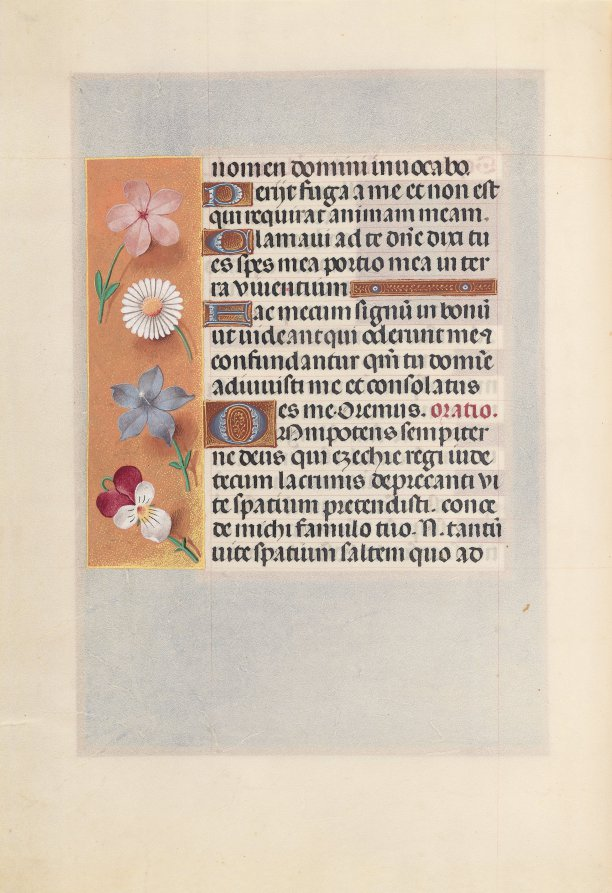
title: Hours of Queen Isabella the Catholic, Queen of Spain: Fol. 268v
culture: Flanders, Ghent and Bruges, late 15th century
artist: Master of the First Prayerbook of Maximillian (Flemish, c. 1444–1519)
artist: and Associates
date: c. 1500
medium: ink, tempera, and gold on vellum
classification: Bound Volume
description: This manuscript was illuminated by a circle of at least five highly organized manuscript painters active in the Flemish cities of Ghent and Bruges. The principal illuminator was Alexander Bening, who painted the majority of the book's miniatures. Manuscripts produced by this circle of artists are renowned for the decoration of their borders, which typically feature a rich variety of realistically-painted flowers, birds, and butterflies. This prayer book, called a book of hours, was intended not for a cleric, but for the private devotions of a lay person-in this case, Isabella the Catholic, Queen of Spain (1451-1504). Isabella's coat of arms embellishes the book's frontispiece. It is unlikely that the book was commissioned by the Queen herself; rather, she probably received it as a diplomatic gift from someone courting her patronage, perhaps Cardinal Francisco Jimenez de Cisneros. A Franciscan friar, Jimenez was dependent upon Isabella for his advancement, first to the post of Queen's confessor in 1492, and then to Archbishop of Toledo in 1495.